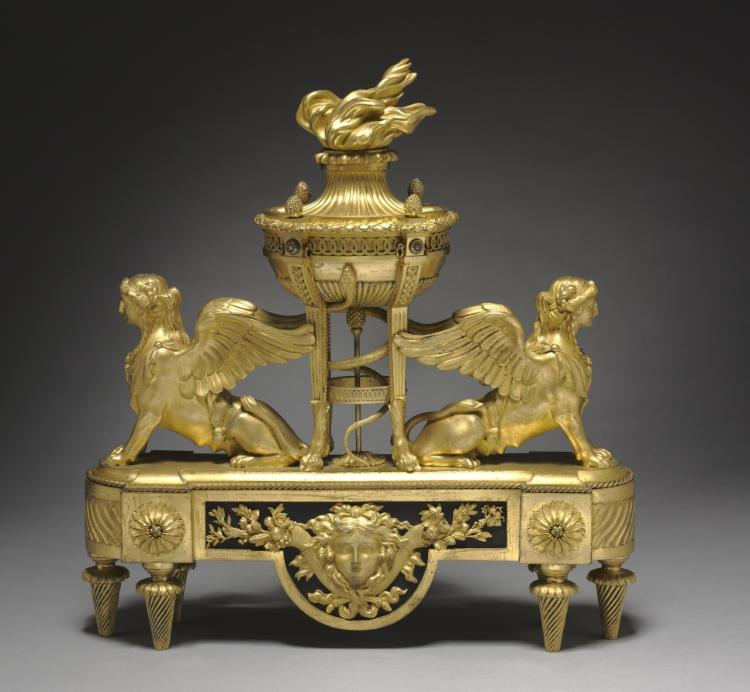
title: Firedog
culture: France, 18th century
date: c. 1785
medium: gilt bronze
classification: Furniture and woodwork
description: Although Louis Jean Desprez’s design was largely inspired by tombs in southern Italy, he added sphinxes in his print Tomb with Sphinx due to his fascination with ancient Egypt. Ancient Egyptians saw the sphinx, a half-human, half-lion mythological creature, as a protector of tombs and temples. The pair of andirons, decorative supports for a hearth’s firewood, alongside Tomb with Sphinx, highlight the growing interest in Egyptomania during the 1700s. Interestingly, the andirons portray ancient Greek and Roman interpretations of the sphinx. Most Europeans learned of ancient Egypt by studying Egyptomania in ancient Roman and Greek art and architecture or Egyptian antiquities brought over by the Romans.